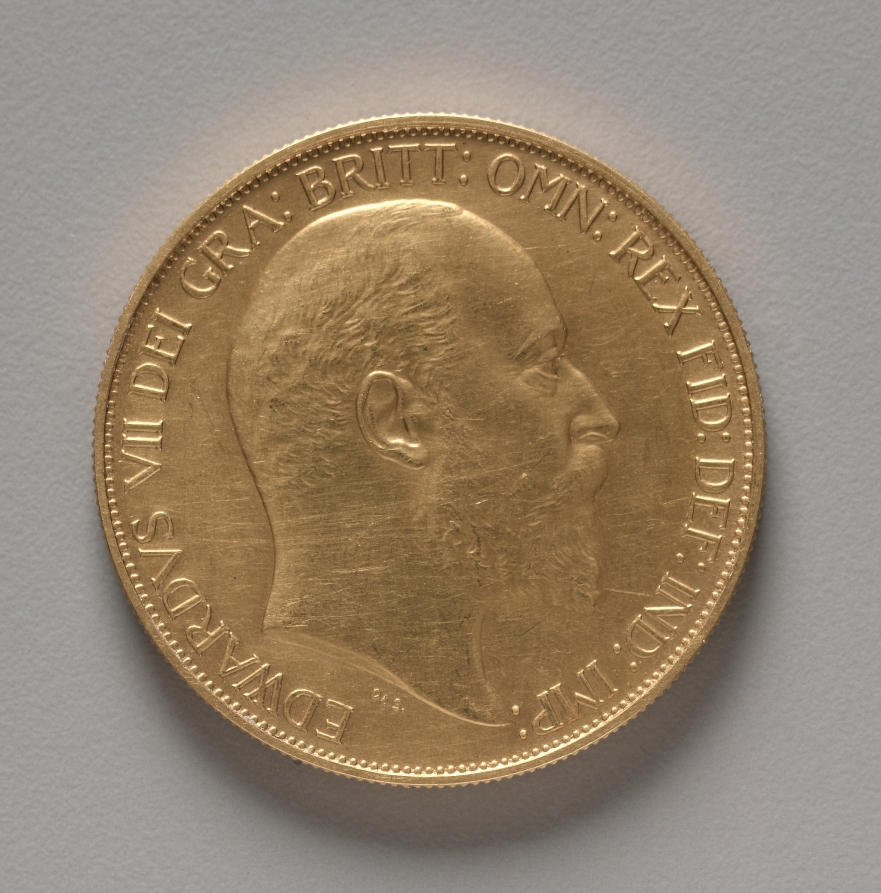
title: Five Pound Piece: Portrait of Edward VII (obverse)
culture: England, Edward VII, 1901-1910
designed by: George Edward de Saulles (British)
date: 1902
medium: gold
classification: Coins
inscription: EDWARDVS VII DEI GRA: BRITT: OMN: REX FID: DEF: IND: IMP: